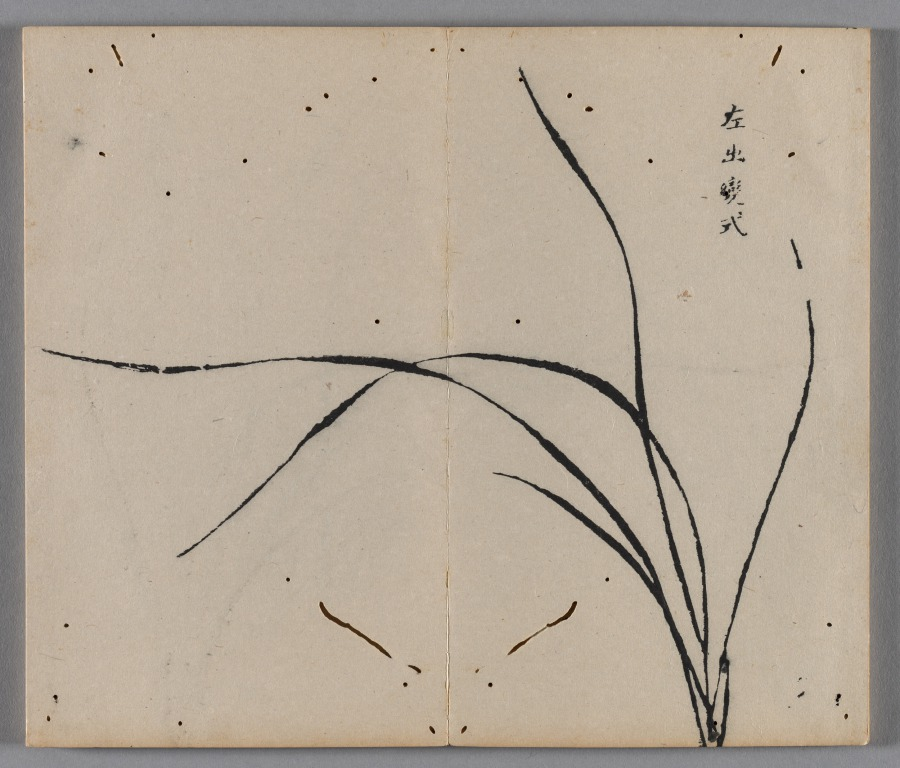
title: Ten Bamboo Studio Painting and Calligraphy Handbook (Shizhuzhai shuhua pu): Orchids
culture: China, Qing dynasty (1644-1911)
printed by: Hu Zhengyan (Chinese, c. 1584–1674)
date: 1633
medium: Woodblock-printed book; ink and colors on paper; first edition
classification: Print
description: Color printing reached a level of perfection in the early 1600s, as seen in this Ten Bamboo Studio Collection of Calligraphy and Painting and the Mustard Seed Garden Manual of Painting (printed 1679 and 1701). The painterly quality, precision in registering (aligning) the woodblocks, and harmonious colors made them the most successful color print editions in Chinese history. Both editions were printed and compiled in Nanjing, spread nationwide, and had a great impact on the arts in Japan and Korea.